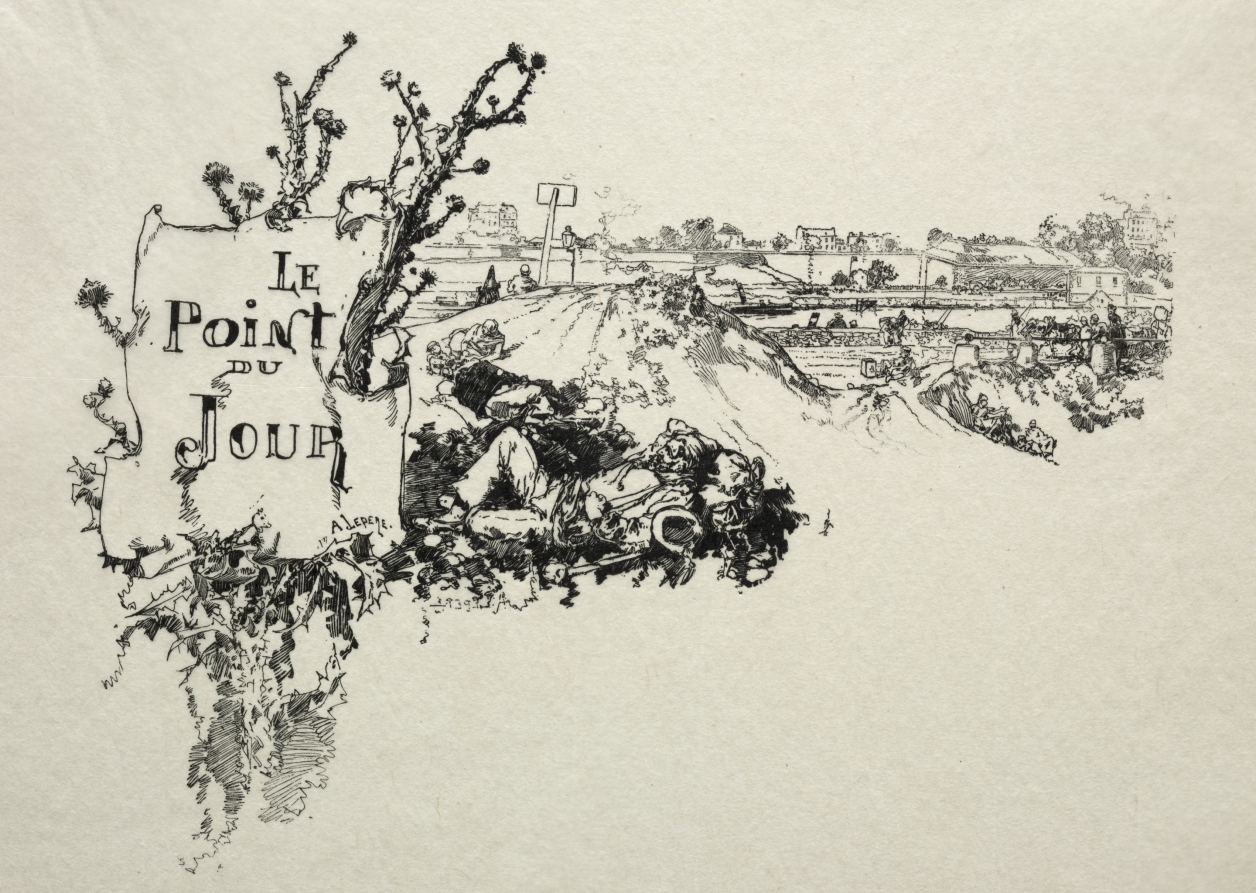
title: Le Point-du-Jour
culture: France, 19th-20th century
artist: Auguste Louis Lepère (French, 1849–1918)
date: 1886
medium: wood engraving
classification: Print